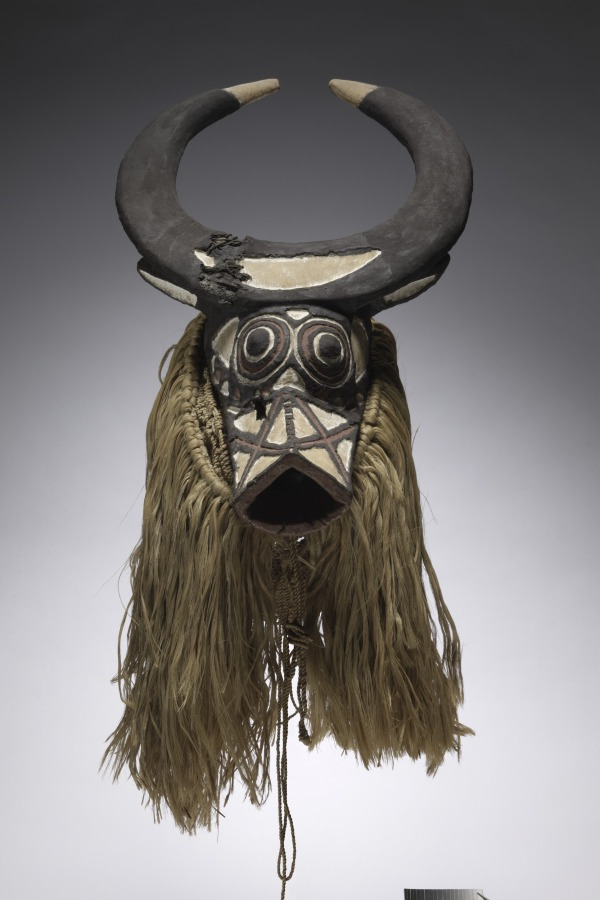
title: Buffalo Mask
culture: Africa, West Africa, Burkina Faso, possibly Bwa-style maker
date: early to mid-1900s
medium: Wood, plant fibers, paint, and iron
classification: Mask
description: Among the Bwa people, masks with human, animal, and fantastic traits typically represent protective bush spirits. This mask’s horns and muzzle identify it as a bush buffalo. Masked dancers appear during the dry season for initiations, funerals of elders, market days, harvest celebrations, and annual renewal rituals to protect the well-being of the community.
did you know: Once broken, the right horn of this mask was repaired; this indicates that it was valued.